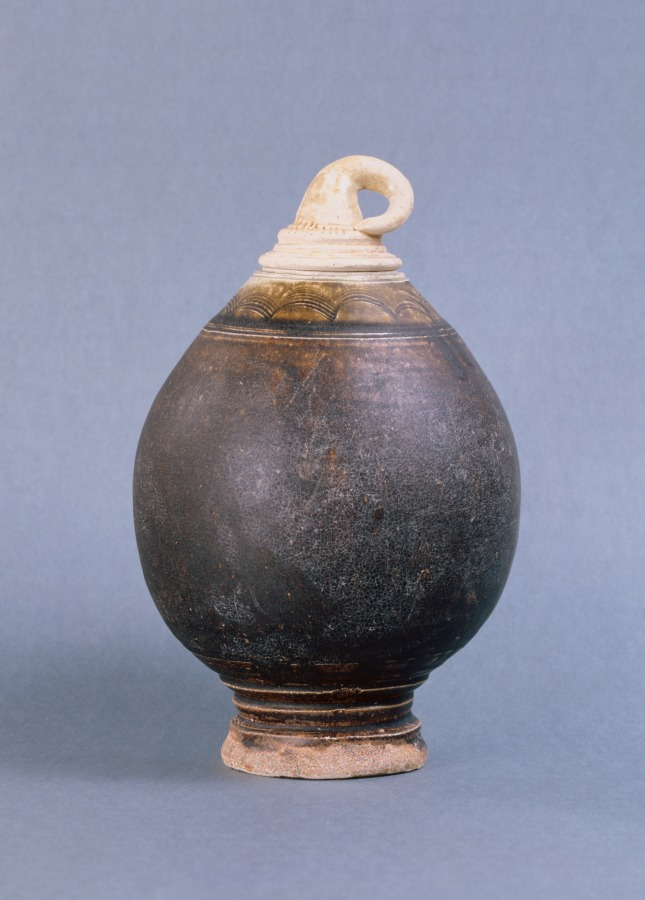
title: Jar in the Shape of a Fruit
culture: Cambodia, Northeast Thai kiln, Khmer Ware, Angkor Wat/Bayon period, 12th century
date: 1100s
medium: glazed pottery with brown slip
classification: Ceramic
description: This dark-brown glazed jar, with the heavy clay body and translucent glaze on the cover and the top just below it, has a rare shape of a fruit. It has a narrow foot with several moldings and incised wavy pattern immediately below the cover which is shaped in the form of a curling fruit stem that forms a handle. It is difficult to determine what type of fruit was meant, possibly a squash.